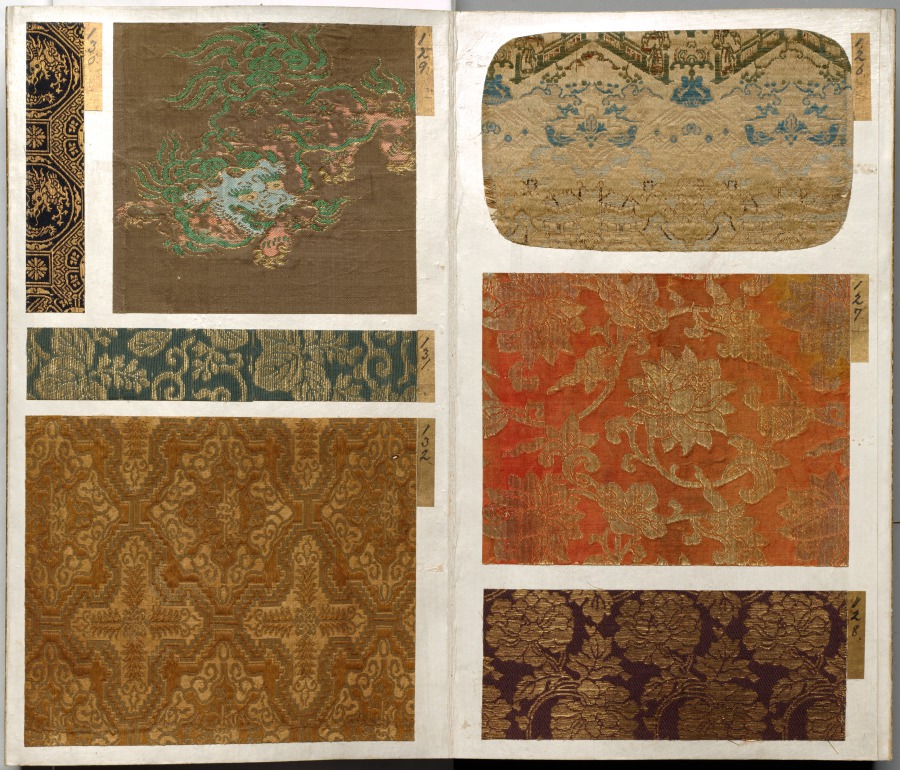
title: Album of Textile Samples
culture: Japan, Edo period (1615–1868)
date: 1600s-1700s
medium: silk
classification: Textile